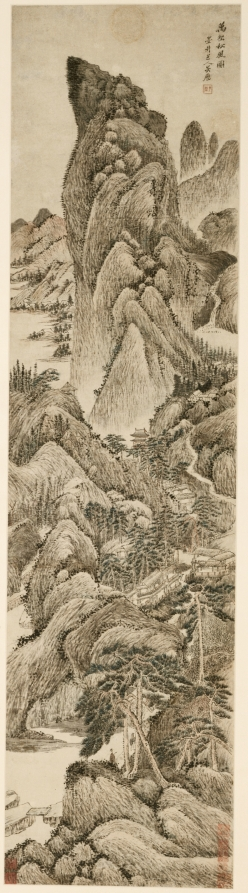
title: Pine Wind from Myriad Villages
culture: China, Qing dynasty (1644-1911)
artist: Wu Li (Chinese, 1632–1718)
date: late 1600s–1718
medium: Hanging scroll; ink and light color on paper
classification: Painting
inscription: Artist's title, signature, and 2 seals: Pine Wind from Myriad Valleys. Mojing daoren Wu Li.[seals] Mojing daoren; Wu Li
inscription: 5 additional seals: 2 of Fang Guancheng 方觀承 (1698–1768); 1 of Ma Chi-tso (1900s); 2 unidentified.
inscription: Two seals of the Qianlong emperor [r. 1736–95], probably authentic, were believed spurious and removed by a previous owner.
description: Wu Li, a native of Jiangsu province, was a talented painter, poet, and calligrapher. He studied painting with Wang Jian (1598–1677) and Wang Shimin (1592–1680), two of the “Four Wangs,” leaders of the Orthodox school of painting in the early Qing period. Through them, he also absorbed styles of earlier Ming dynasty masters. Wu was highly praised by his contemporaries and his paintings were in demand, but his interest in philosophy and religion curtailed his painting activities later in life. Wu Li converted to Christianity and in 1688 was ordained as one of the first 3 Chinese Jesuit priests. He spent the final 30 years of his life primarily in missionary work with the poor. Although this painting is undated, the sooty blackness of the ink tones and the easy self-confidence with which they are set down on paper echo recognized late works.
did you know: A figure carrying a qin, zither, walks between the buildings, perhaps intending to play music for the two men seated beneath the pines.